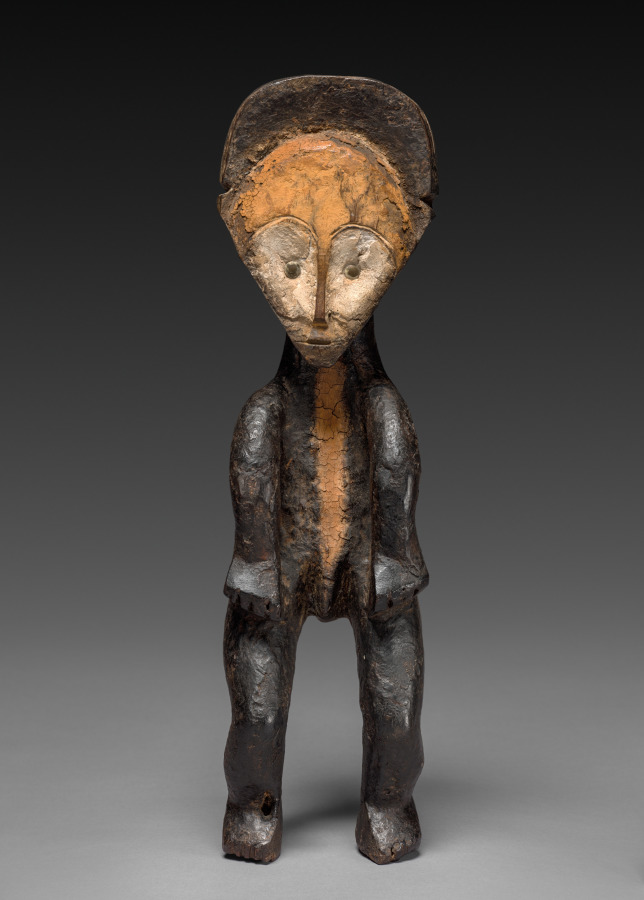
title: Male Figure (Ofika)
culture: Africa, Central Africa, Democratic Republic of Congo, Mbole-style carver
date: late 1800s or early 1900s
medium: Wood, colorant, and upholstery studs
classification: Sculpture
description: Figures such as this, known as ofika, were central to the initiation practices and the enforcement of laws among the all-male Lilwa association, a hierarchical organization that served educational, judicial, political, economic, and ritual functions among the Mbole. Meant to instill a moral code and to act as a cautionary symbol during initiation for Lilwa novices, ofika figures are believed to represent criminals who were ritually hanged for transgressions against Lilwa laws. The figure’s encrusted surface imitates how members covered their bodies with a substance made of ashes and palm oil during burial rites.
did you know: The stripe painted down the figure's torso represents the cord used for execution.